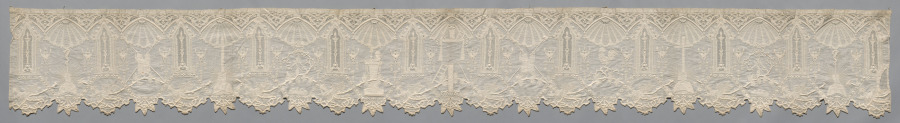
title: Altar Cloth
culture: Italy(?)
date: 1800s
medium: Plain weave cotton: needle lace (drawnwork), appliqué, and embroidery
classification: Embroidery